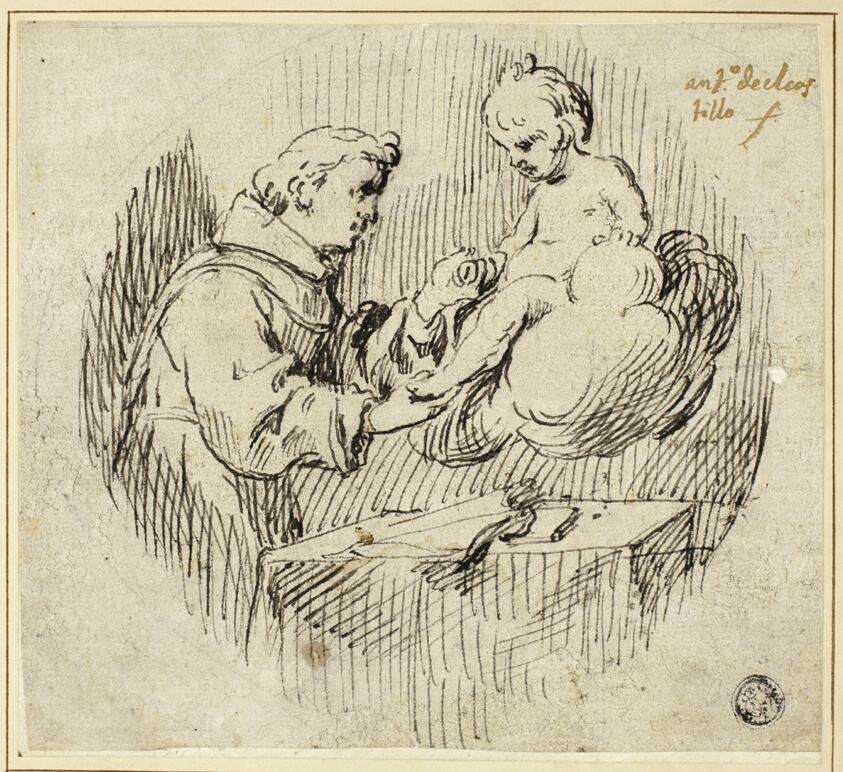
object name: Drawing and Watercolor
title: Saint Anthony of Padua with the Infant Jesus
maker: Antonio del Castillo y Saavedra (Spanish, 1603-1667)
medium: Pen and black ink, on ivory laid paper, laid down on ivory laid paper, laid down on cream wove card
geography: Spain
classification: pen and ink drawings; drawings (visual works); prints and drawing